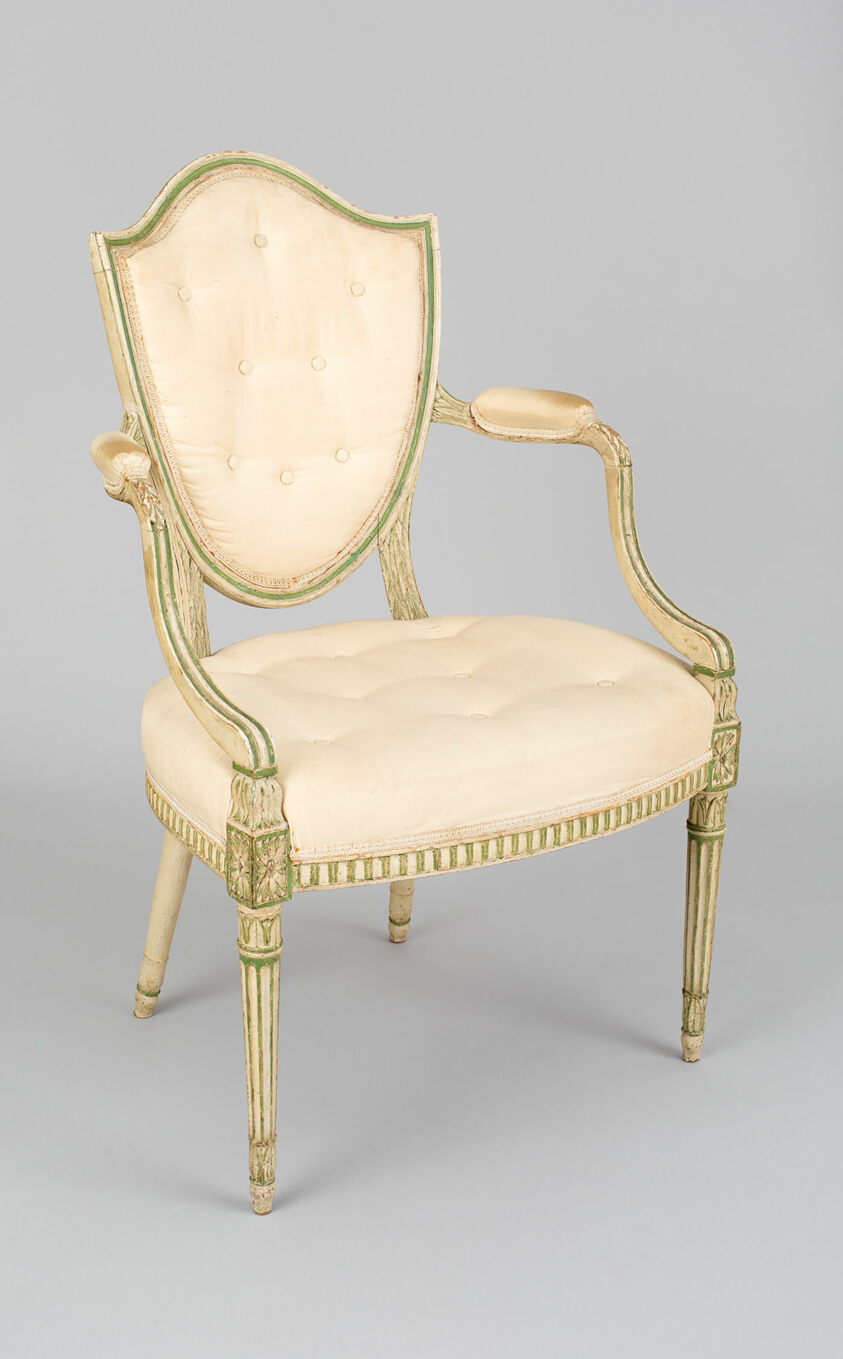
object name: Furniture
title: Armchair (one of a pair)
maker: England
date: c. 1770/80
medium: Painted beech, modern upholstery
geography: England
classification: seating; furniture; european decorative arts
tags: furniture